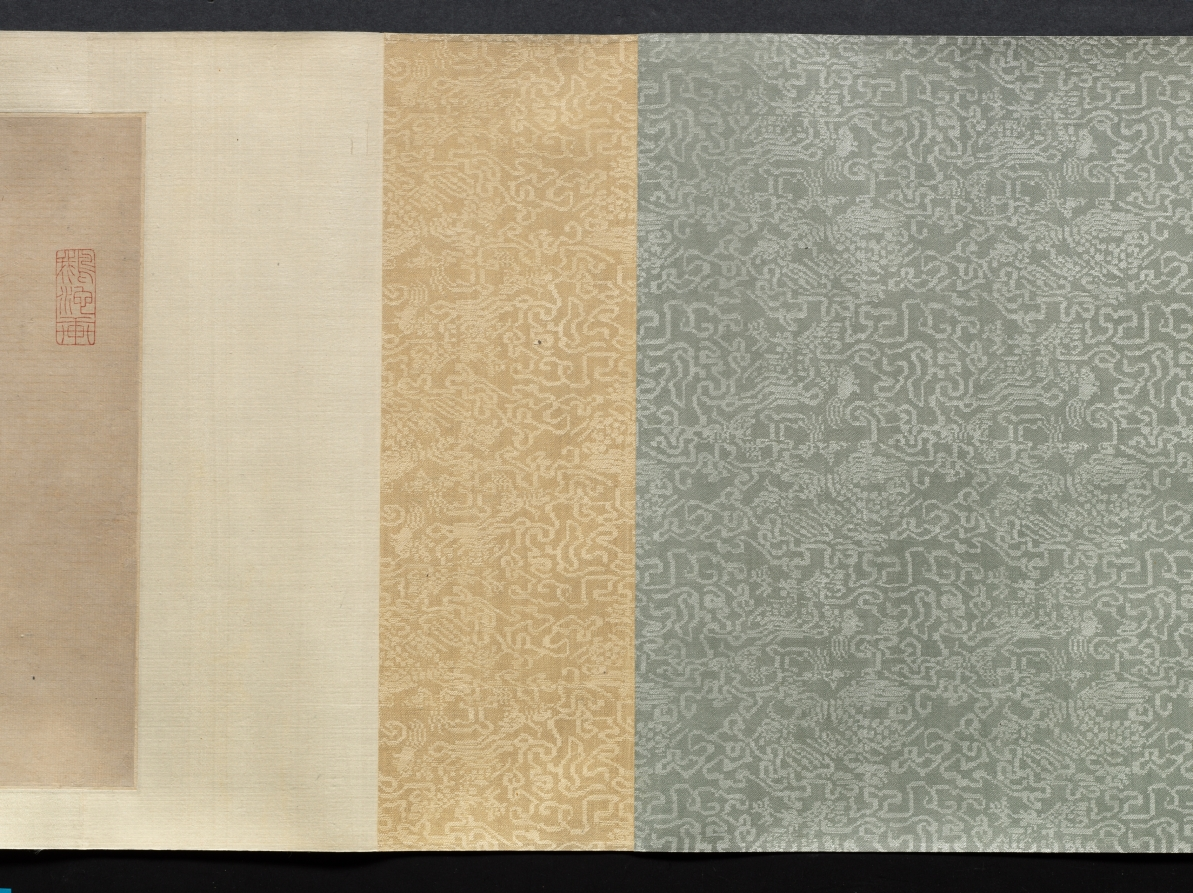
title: Beggars and Street Characters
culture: China, Ming dynasty (1368–1644)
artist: Zhou Chen (Chinese, c. 1450–c. 1536)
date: 1516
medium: Handscroll; ink and light color on paper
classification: Painting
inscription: 題: 周臣流氓圖. 古堇趙鶴琴 [印] 老鶴臨池; 鵝池軒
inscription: 正德丙子秋七月，閒窗無事 ，偶記素見市道丐者種種態度。乘筆硯之便，率爾圖寫。雖無足觀，亦可以助警勵世俗云。 東邨周臣記 [印]東邨; 舜卿; 鵝場散人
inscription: 吳中東邨周君，善丹青，尤長於人物。此圖其所見盛市丐者之狀種種，各盡其態，觀者絕倒。嗟乎，今之晝夜乞哀以求富貴者，安得起周君而貌之耶。臥雲徵君出示，余漫題其後。 甲子歲十月吳門黃姬水 [印] 士雅山人; 另一印不詳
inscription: 是冊凡數種。其飢寒流離疲癃殘疾之狀，種種之異。觀此而不惻然心傷者，非仁人也。計正德丙子逆瑾之流毒已數年。而[江]彬 [錢] 寧輩肆虐方熾。意分符剖竹諸君，亦鮮有能撫字其民者。然則舜卿此作，殆與鄭君 流民圖同意。其有補於治道者不淺，要不可以墨戲忽之也。 長洲張風翼題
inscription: 東村此筆，蓋圖寫飢寒乞丐之態，以警世俗耳。而質山 [黃姬水]欲其寫昏夜乞哀，而靈墟[張鳳翼]則擬之於安上門圖。二君之見，其各有所指哉。昔唐六如每見周筆，輒稱曰：周先生！蓋深服其神妙之不可及。若此冊者，信非他人可能而有符於六如之心伏矣。豈易得耶。若黃、張之指，則又論於畫之外，不在於形似筆墨之旨也。 萬歷丁丑十二月三日 茂苑文嘉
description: Zhou Chen from Suzhou provides rare depictions of impoverished people that once filled the city’s markets and streets. Despite Suzhou’s prosperity, its rapid growth polarized society, including the wealthy and those who had deserted their farmlands, who were without homes, unemployed, or sick. Amid these are figures who inspire fear rather than empathy. The painting may thus be informed by local practices at the end of the lunar year, in which street beggars, in exchange for food or money, would dress up like ghosts and demons to drive out evil forces.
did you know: Although Zhou Chen's original composition was an album of 24 figures, today it is mounted as two handscrolls, one in the Cleveland collection and one in the Honolulu Museum of Art.